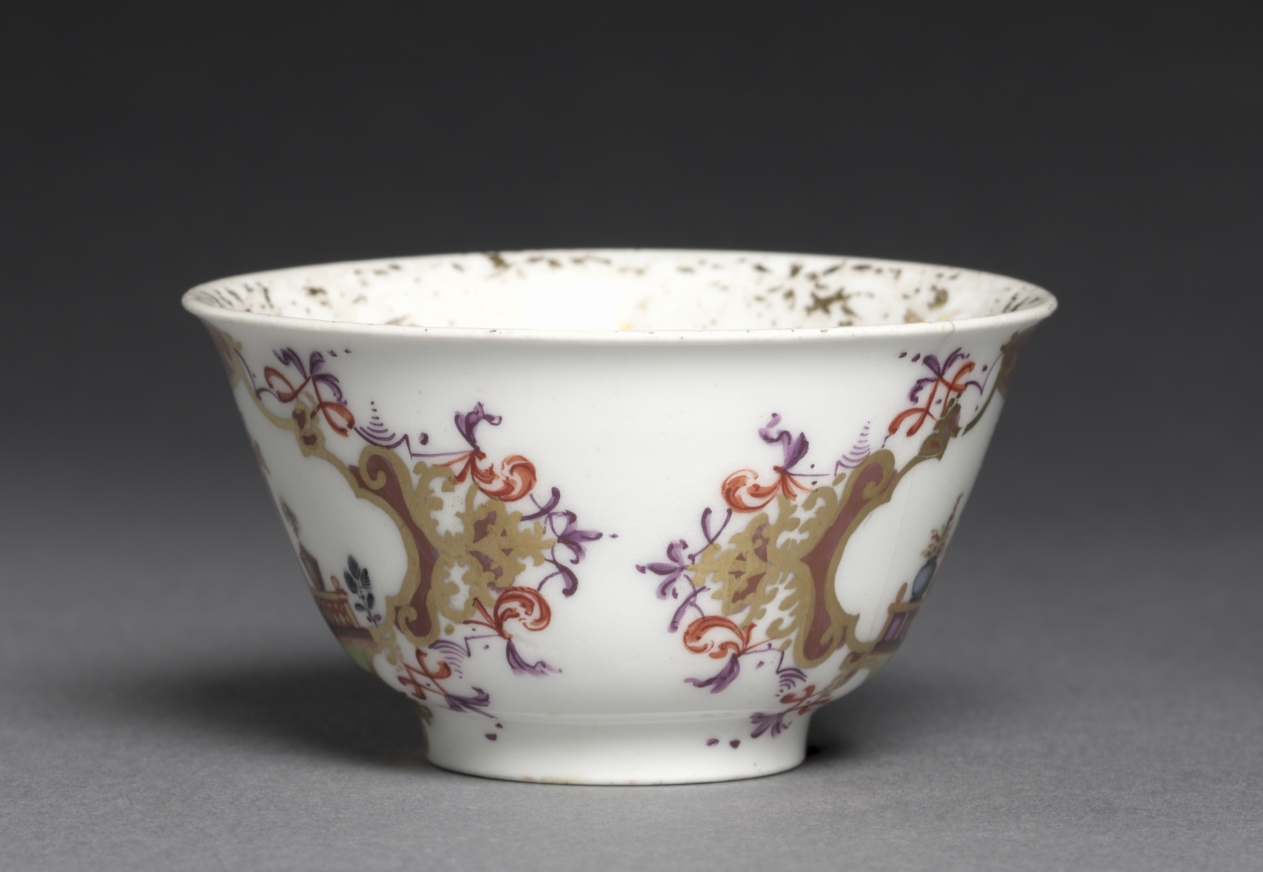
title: Cup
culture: Germany, Meissen, 18th century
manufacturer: Meissen Porcelain Factory (German, est. c. 1710)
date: c. 1725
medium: porcelain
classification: Ceramic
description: About 1725, Herold introduced a new variant of his "chinoiserie" decoration, in which small, full-length figures were depicted against cloudless skies, represented by the now brilliantly white porcelain, within foliate borders of gilt and enamel. This configuration became the standard formula for Meissen figural decoration for the next twenty years, although European subjects came to be depicted with greater frequency toward the middle of the century.